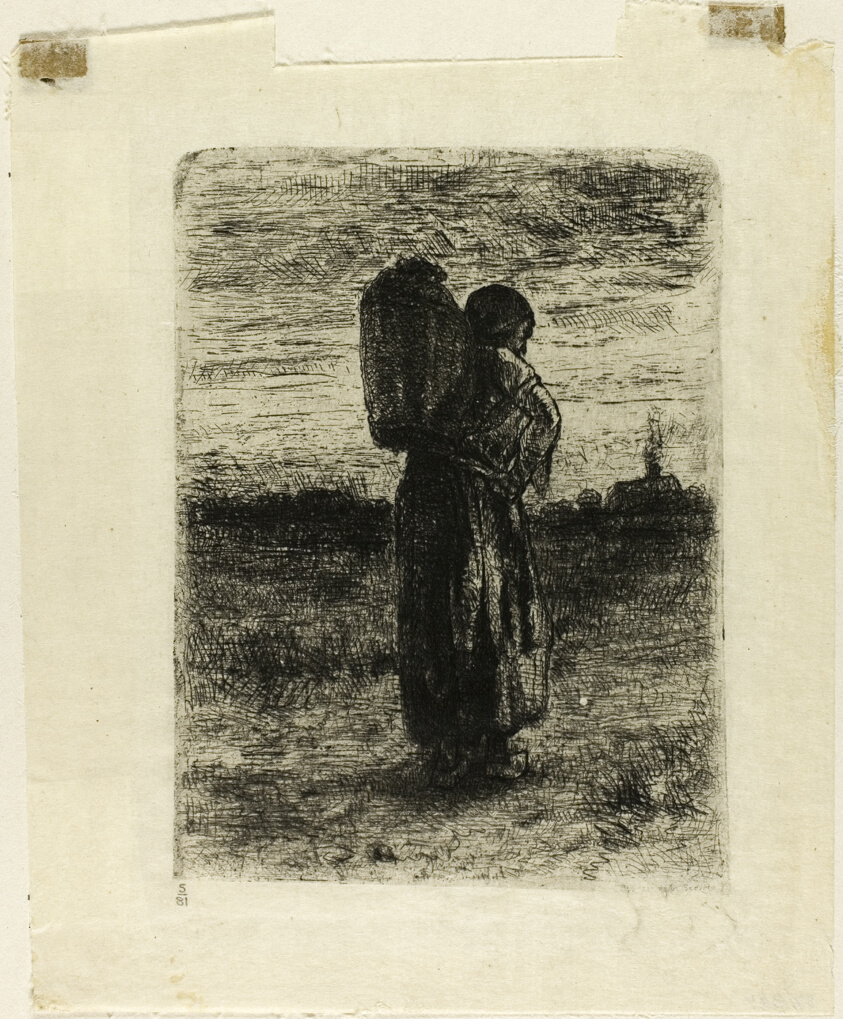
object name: Print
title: Homewards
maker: Jozef Israëls (Dutch, 1824-1911)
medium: Etching on paper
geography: Holland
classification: etching; print; prints and drawing